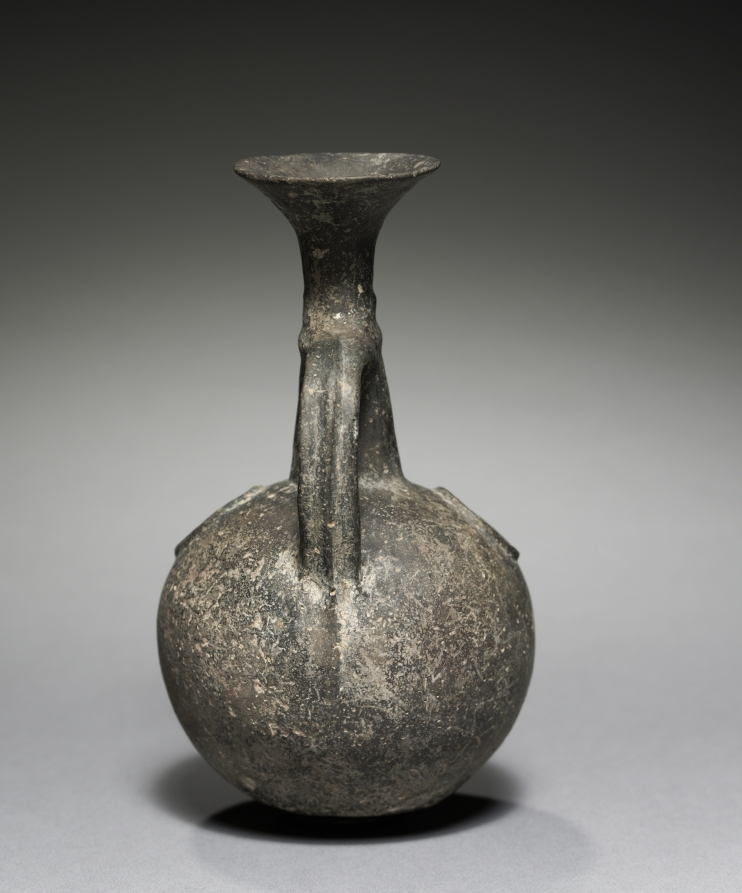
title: Jug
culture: Cyprus, late Cypriot I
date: c. 1600–1450 BCE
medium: base-ring ware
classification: Ceramic